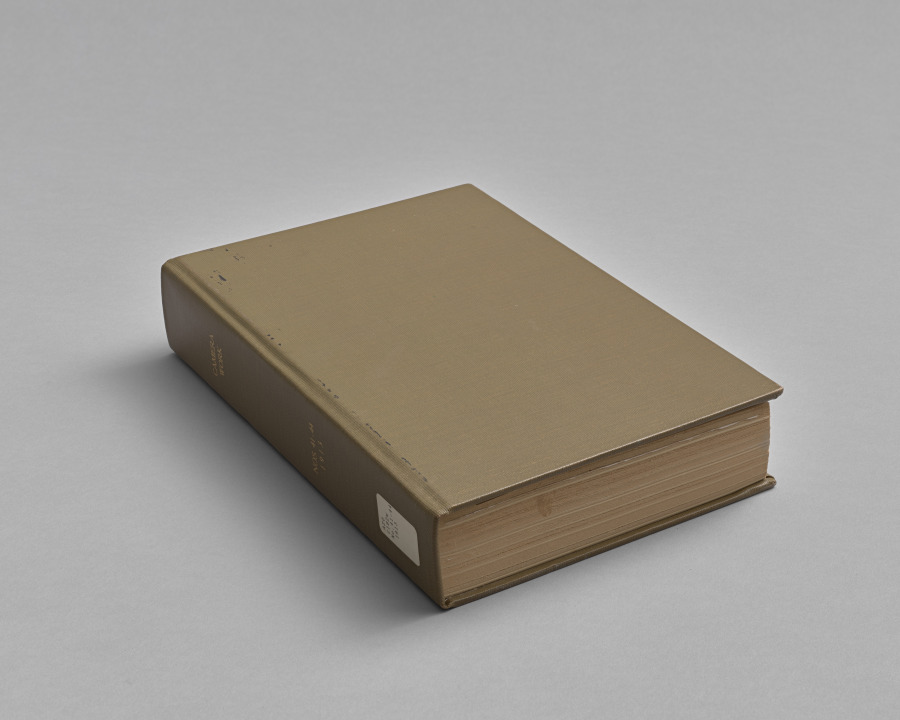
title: Camera Work: Number 41, January 1913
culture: England, 20th century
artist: Alfred Stieglitz (American, 1864–1946)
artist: Julia Margaret Cameron (British, 1815–1879)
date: 1913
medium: photogravure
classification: Bound Volume